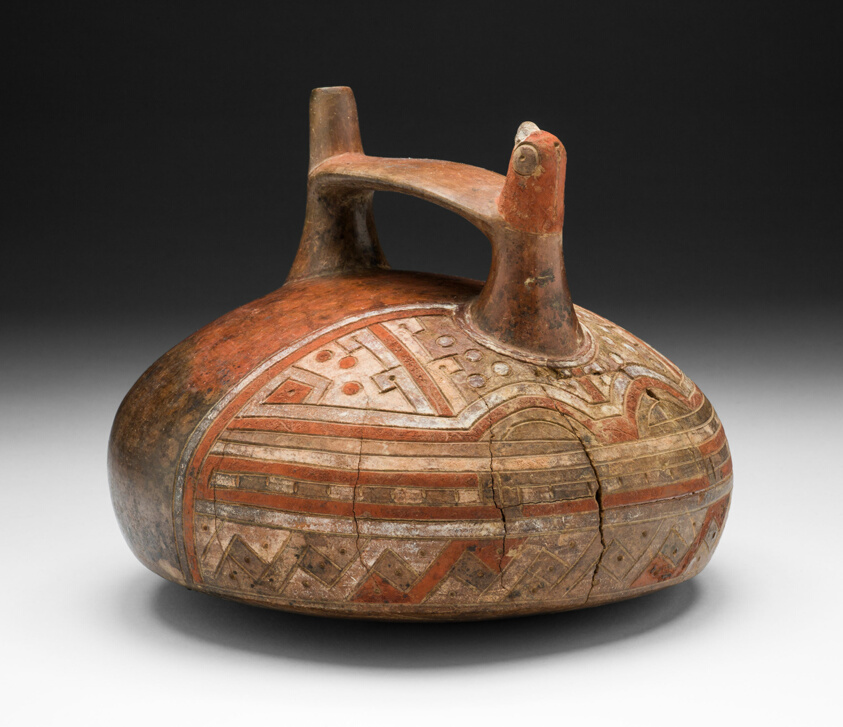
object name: Vessel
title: Vessel with Abstract Feline Mask and Bird-Head Spout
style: paracas, early horizon, Pre-Columbian, americas, andes, Arts of the Americas, andean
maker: Paracas (Ica Valley, south coast, Peru)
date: 650–150 BCE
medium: Ceramic with resinous postfire paint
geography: Ica Valley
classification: earthenware; art of the americas; ceramics; vessel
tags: feline, animals, birds, geometric, abstract motifs